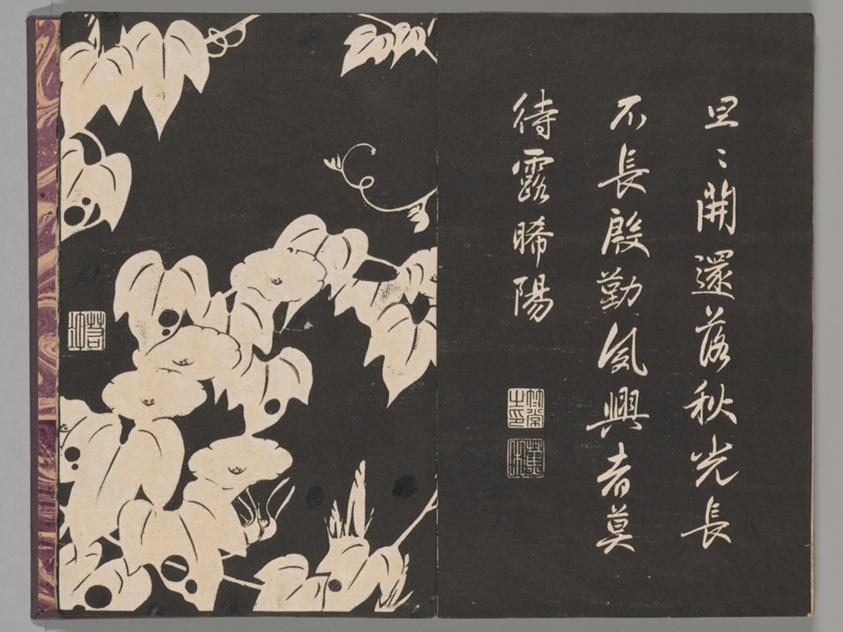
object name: Book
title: Soken sekisatsu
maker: Ito Jakuchu (Japanese, 1716-1800)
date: 1767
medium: Woodblock printed book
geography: Japan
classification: book